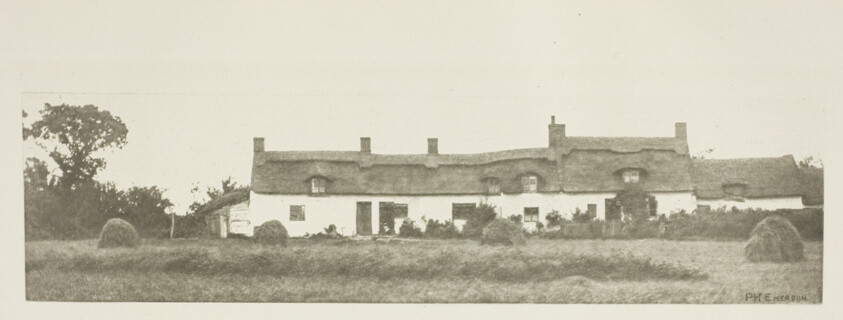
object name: Photograph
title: Norfolk Cottages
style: 19th century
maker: Peter Henry Emerson (English, born Cuba, 1856–1936)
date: c. 1883/87, printed 1888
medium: Photogravure, pl. XVIII from the album "Pictures of East Anglian Life" (1888)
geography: England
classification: photogravure; photomechanical process; photography; photograph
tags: Collected by Hugh Edwards, Pictures of East Anglian Life, Seat of War in the Crimea